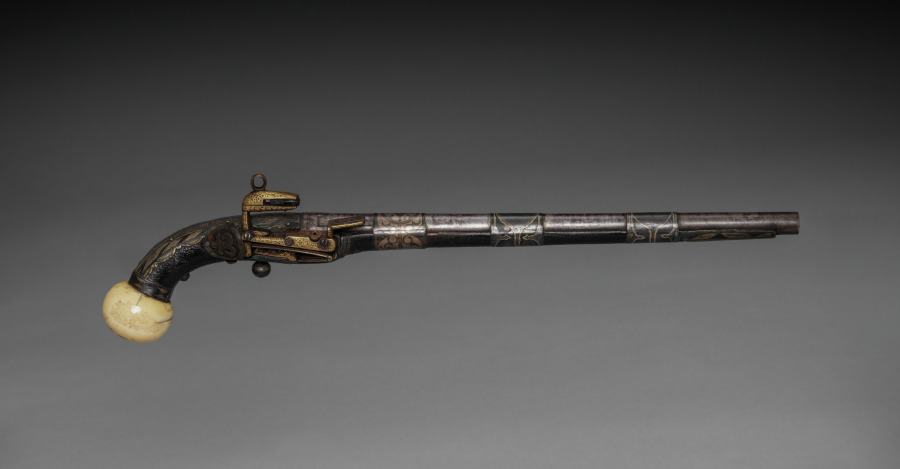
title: Ball-Butted Miquelet-Lock Pistol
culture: Causasus, Daghestan, 19th century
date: c. 1850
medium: steel, silver, gold inlay, leather, ivory ball butt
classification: Arms and Armor